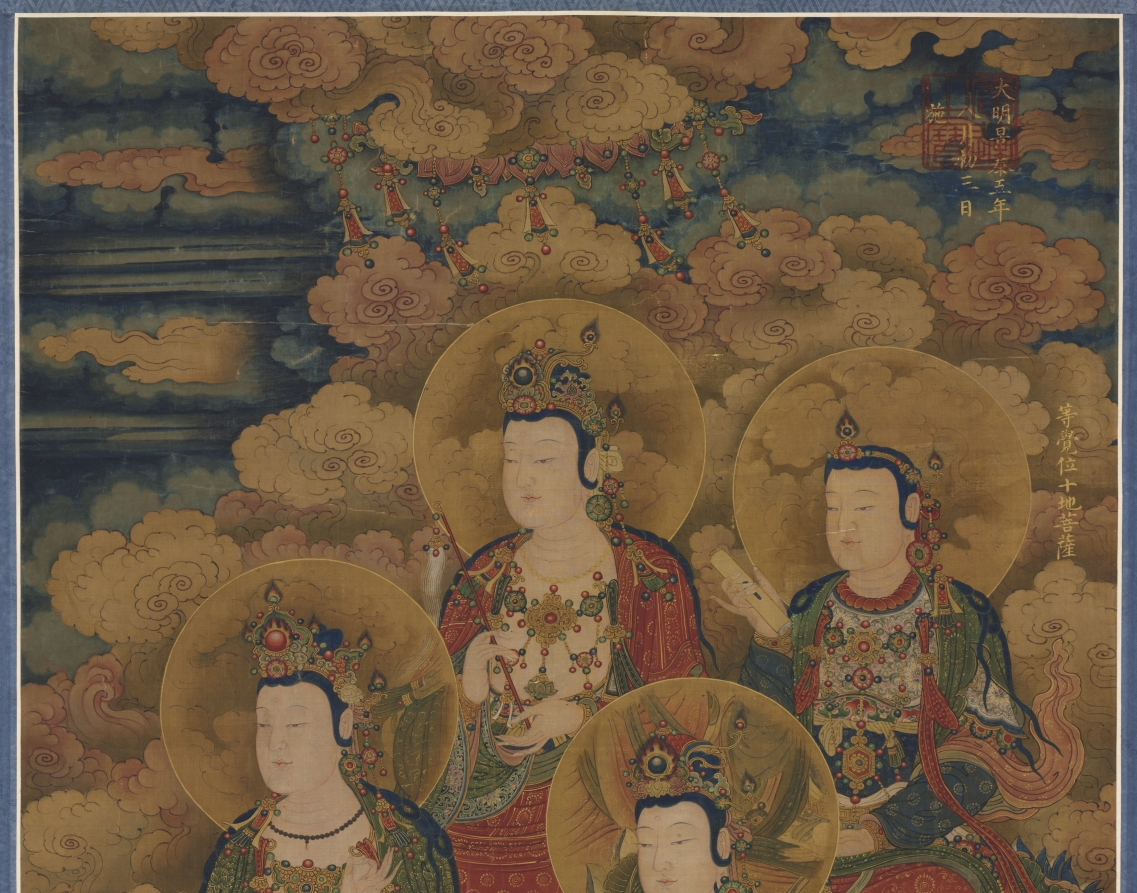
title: The Bodhisattvas of the Ten Stages in Attaining the Most Perfect Knowledge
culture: China, Ming dynasty (1368–1644)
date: 1454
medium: hanging scroll; ink and color on silk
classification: Painting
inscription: 大明景泰五年八月初三日施 [印] 廣運之寳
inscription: 御用監太監尚義王勤等奉命提督監造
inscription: 等覺位十地菩薩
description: This painting represents bodhisattvas of the 10 stages of enlightenment undergoing the final processes toward Buddhahood. This and CMA 1973.70.2 form part of a set of scrolls that were used to perform the Water-Land (shuilu) ritual. The sinuous curves of scarf and drapery, the layering of garments, and the minute detail all reflect the opulent visual atmosphere that surrounded the Ming worshipper in temples and spirit halls throughout the country. In the upper right corner of each painting is an imperial seal and an inscription in gold: Donated on the third day of the eighth month in the fifth year of the Jingtai reign (1454) of the Great Ming. Written in ink in the lower left corner is the record that they were made on imperial order, probably to present them to the Da Longfu monastery in Beijing.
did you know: This painting was used in the grandest of the Buddhist mortuary rites, the Water-Land (shuilu) ritual, which was conducted for the salvation of “all souls of the dead on land and sea.”